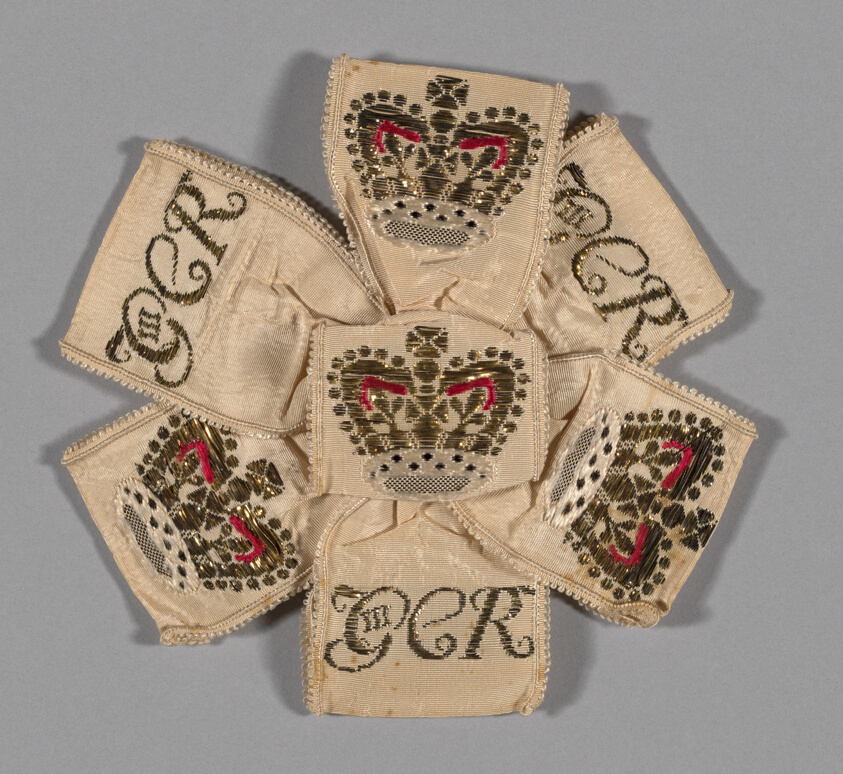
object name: Textile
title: Coronation Ribbon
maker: England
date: 1761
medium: Silk, warp-faced plain weave; brocaded in gilt strips and silk threads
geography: England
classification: textile; accessories (object genre)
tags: propaganda, coat of arms, royalty